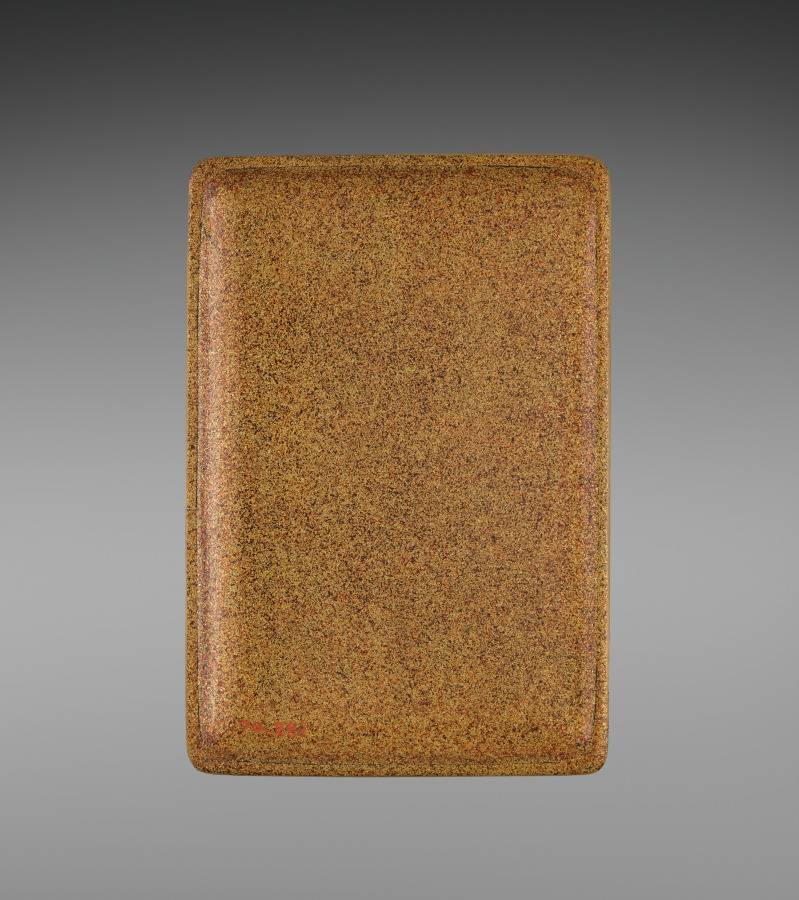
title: Writing Box (Suzuribako) with the “First Song” (Hatsune) Chapter from the Tale of Genji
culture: Japan, Meiji period (1868–1912)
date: early 1900s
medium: Lacquered wood with gold and silver sprinkled powder (maki-e), foil application (kirikane), and metal inlay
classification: Lacquer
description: The design of this box was inspired by an object in the 1639 lacquer wedding set of Chiyohime, the daughter of the shogun (ruler). Information about the set became available in the Meiji period, leading some lacquer artists to emulate its designs. This box features a scene from the chapter “First Song” (Hatsune) of the Tale of Genji, in which Prince Genji and his love Murasaki enjoy her garden. It incorporates the written characters for “first” (初, hatsu) and “sound” (音, ne), indicating the first song of the warbler in spring, associated with the new year—the water dropper for mixing the ink is in the shape of this bird.